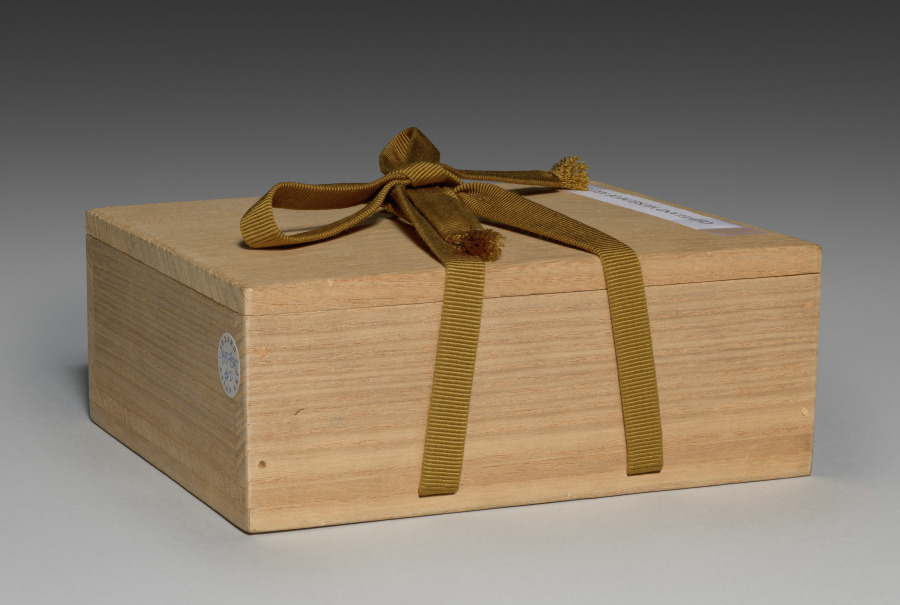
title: Small Dish (Kozara) with Fireworks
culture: Japan, Edo period (1615–1868)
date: mid-1600s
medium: Porcelain with molding and underglaze blue (Hizen ware, Nabeshima type)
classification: Ceramic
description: This dish evokes the popular summer pastime of fireworks displays.